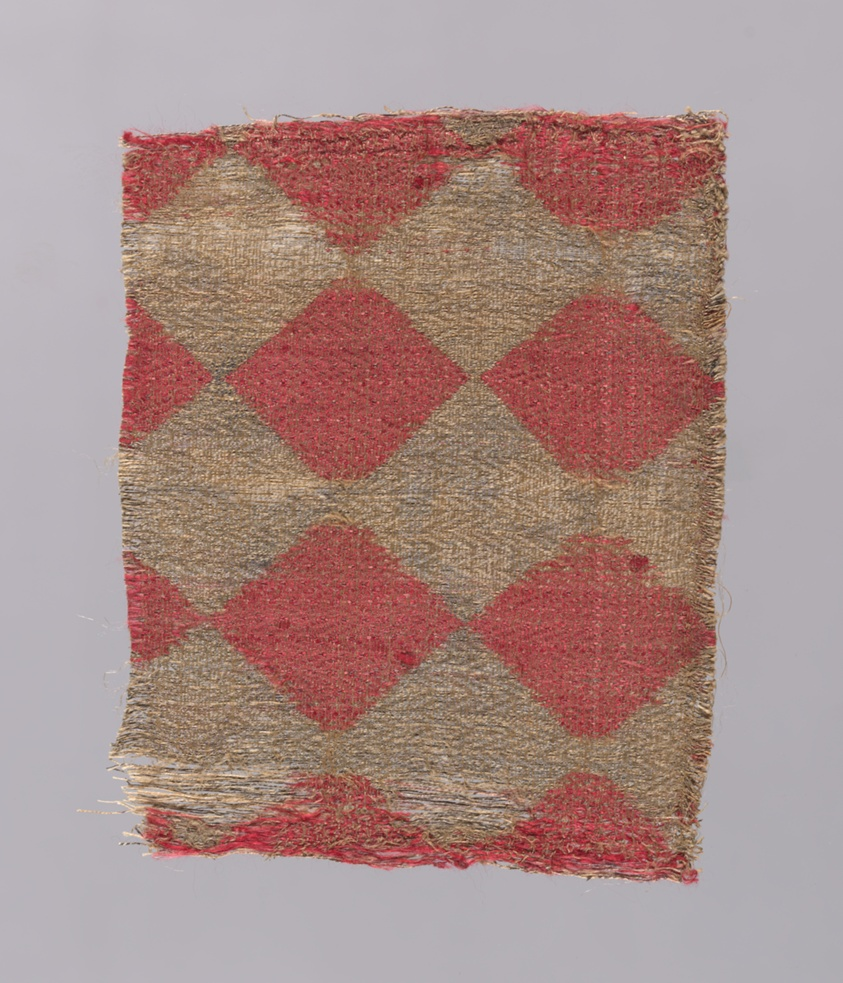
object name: Textile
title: Fragment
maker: Spain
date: 13th/14th century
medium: Silk and gilt-animal-substrate-wrapped linen, warp-float face of weft chevron twill weave of two color complementary wefts and inner warps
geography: Italy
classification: textile; weaving